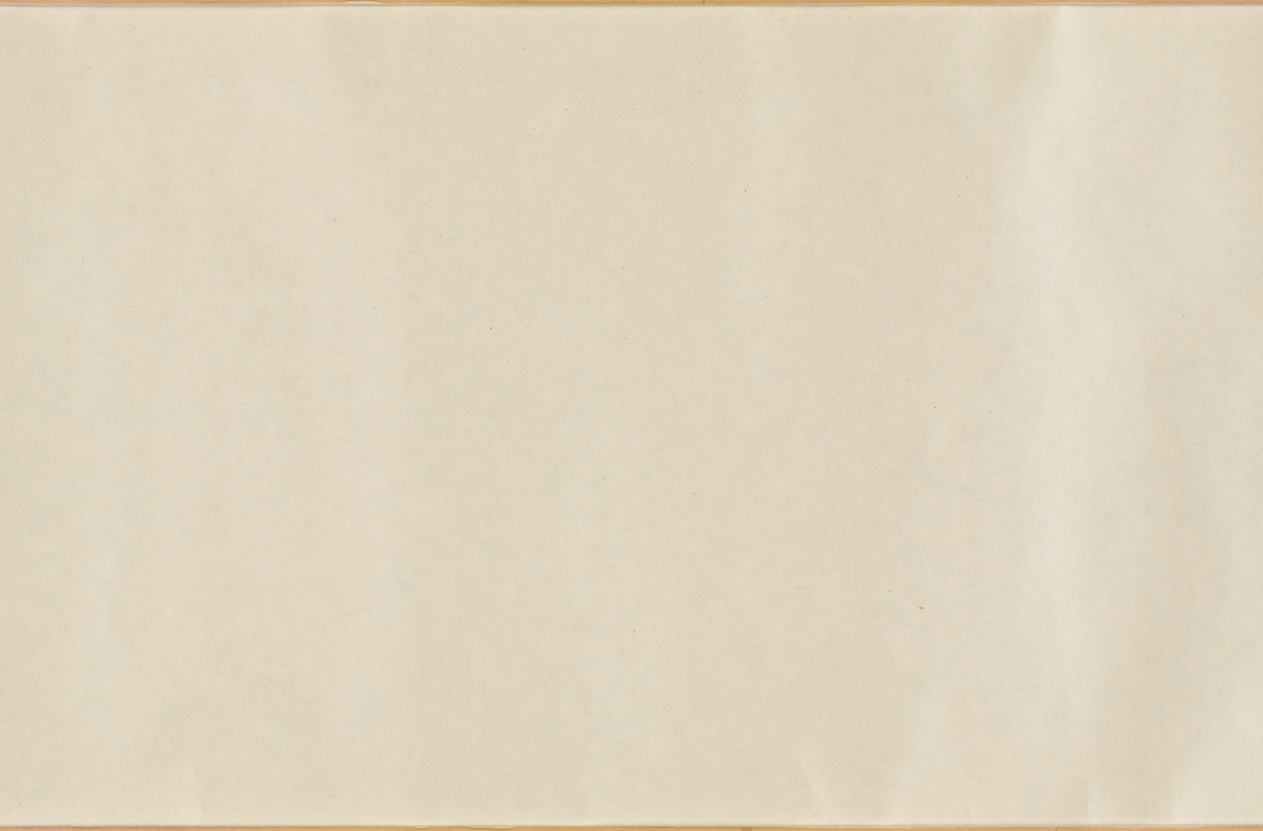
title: Selections from the New Collection of Japanese Poems from Ancient and Modern Times (Shinkokin wakashū) with Printed Designs of Chinese Lions and Crab Finger Grass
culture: Japan, Edo period (1615–1868)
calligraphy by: Hon'ami Kōetsu (Japanese, 1558–1637)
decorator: Tawaraya Sōtatsu (Japanese, c. 1570–c. 1640)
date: early 1600s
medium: handscroll; ink, gold, and silver on paper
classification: Calligraphy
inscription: Seal: 光悦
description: Hon’ami Kōetsu was a calligrapher and craftsman who frequently collaborated with the painter Tawaraya Sōtatsu, considered the first master of the Rinpa school. Kōetsu brushed seven poems from the autumn section of a poetry anthology onto dyed paper with motifs designed and printed in gold and silver by Sōtatsu.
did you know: Before becoming a master painter of screens, Tawaraya Sōtatsu painted fans.